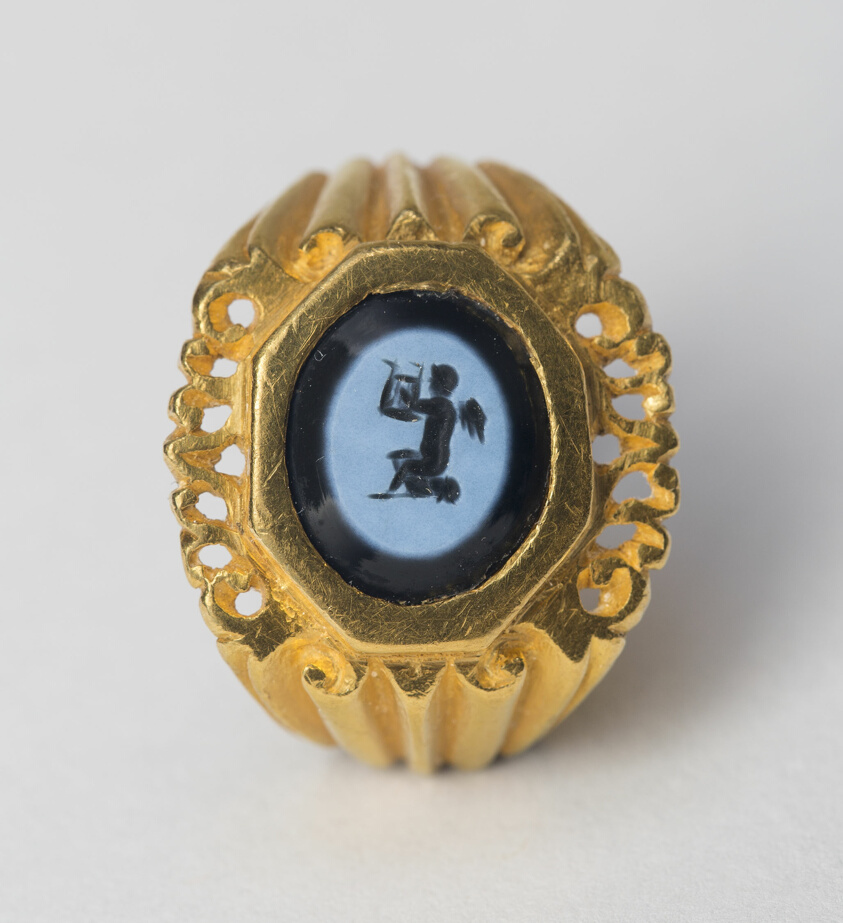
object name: Costume and Accessories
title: Finger Ring with Intaglio Depicting Eros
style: roman (ancient, style or period), ancient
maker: Roman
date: 3rd century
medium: Gold and banded stone or glass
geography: Rome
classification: ring (jewelry); jewelry; costume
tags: gods (deities)